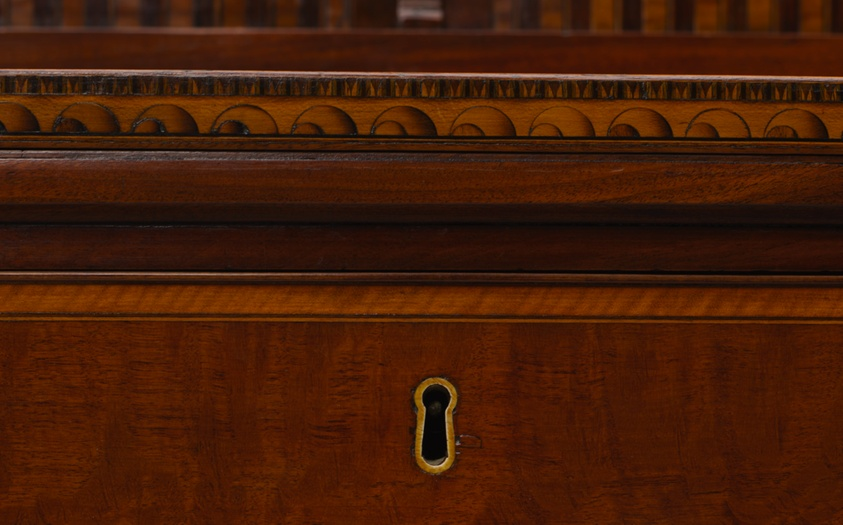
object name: Furniture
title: Tambour Desk and Bookcase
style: federal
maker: Attributed to the workshop of John and Thomas Seymour (American, active 1793–1804); Or attributed to the workshop of Thomas Seymour (American, active 1804–1817); Boston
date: c. 1800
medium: Mahogany, satinwood, white pine, cherrywood, chestnut, with brass, ivorine, and leather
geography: Boston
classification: furniture; american arts; american decorative arts; bookcase; decorative arts; desk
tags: furniture, cabinets, shelves, drawer, locks, keys, bookcase, decorative arts, desk, escutcheons